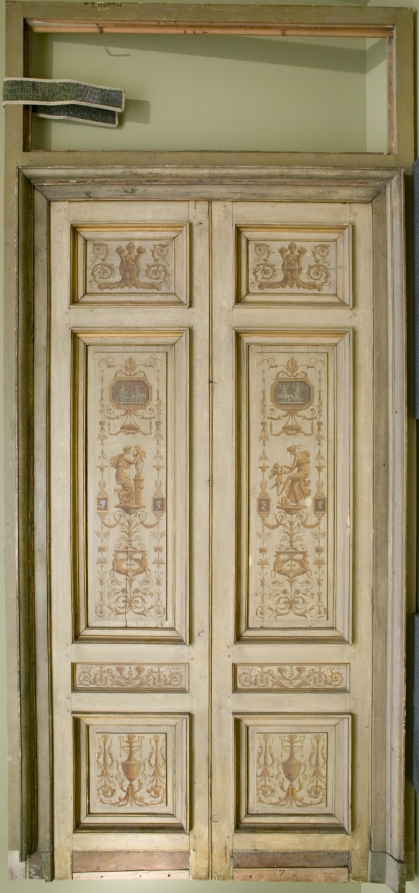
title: Double-Leaf Doors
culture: France, 18th century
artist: Pierre Rousseau (French, 1751–1829)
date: 1790s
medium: oil on wood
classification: Painting